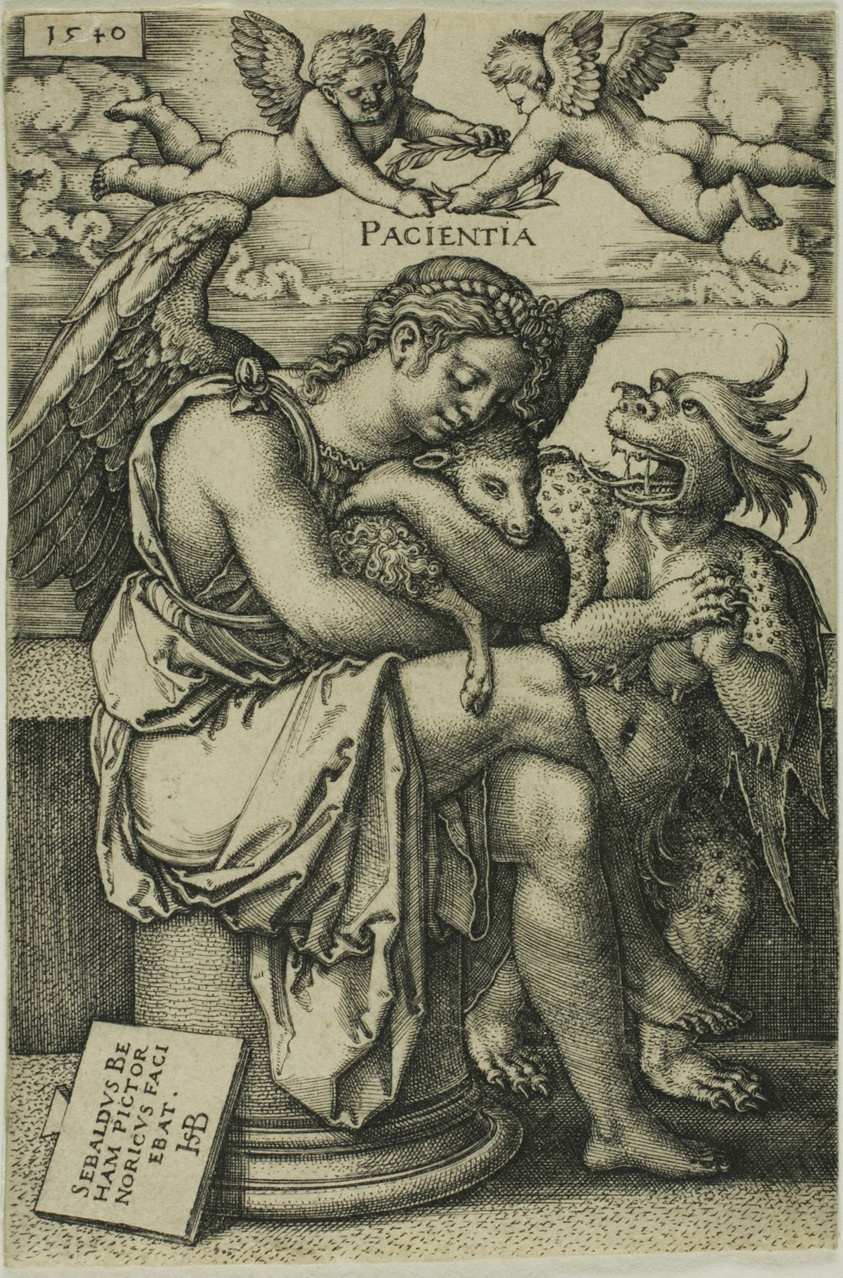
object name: Print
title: Patience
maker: Sebald Beham; German, 1500-1550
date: 1540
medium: Engraving in black on ivory laid paper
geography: Germany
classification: engraving; print; prints and drawing